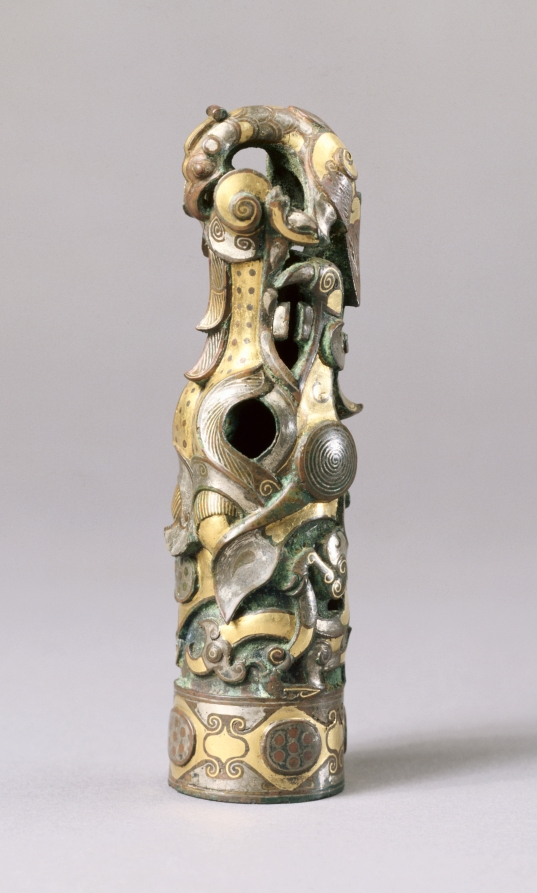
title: Finial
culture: China, Henan province, Jincun, Warring States period (475–221 BCE)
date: 475–221 BCE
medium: bronze inlaid with gold and silver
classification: Metalwork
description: Chariots and weapons were associated with hunting and warfare in the ancient world. Those bronze fittings with lavish inlaid decoration were status symbols of rulers and high-ranking officials. This finial combines extravagance and ferocious beauty to reveal the aesthetics of the time. The birds with hooked beaks are above the intertwined serpent-dragons. Such artistic conception emphasizes the power of the bird in combat. Every facet of this finial is exquisitely crafted to give full play to the inlaid decoration.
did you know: This finial is made to be placed on the top of a pole or staff.